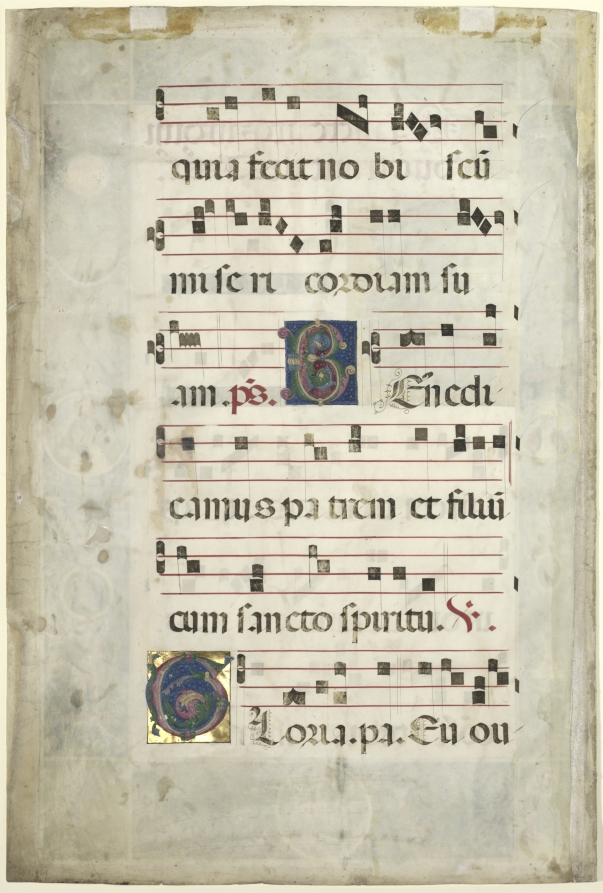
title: The Trinity: Leaf from a Gradual with Initial B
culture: Italy, Perugia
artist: circle of Perugino (Italian, c. 1450/55–1523)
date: c. 1496–1502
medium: ink, tempera, and gold on parchment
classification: Manuscript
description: The focus of this lavishly illuminated page is a large initial B containing a representation of the Holy Trinity (three persons in one godhead). The text, Benedicta sit sancta Trinitas, introduces the opening of the Introit for Mass on Trinity Sunday, celebrated one week after Pentecost. An illusion has been created by the artist who painted the framing initial to appear three-dimensional. Beyond the initial a landscape recedes as if viewed through an open window. The decoration extends into all four margins that are filled with small miniatures depicting saints (one was left blank). This page is a masterful example of Renaissance manuscript painting with classicizing leaf scrolls, masks, urns, putti, and other decorative motifs fashionable in Italy at the close of the 15th century. It may come from a set of choir books illuminated for Perugia Cathedral.